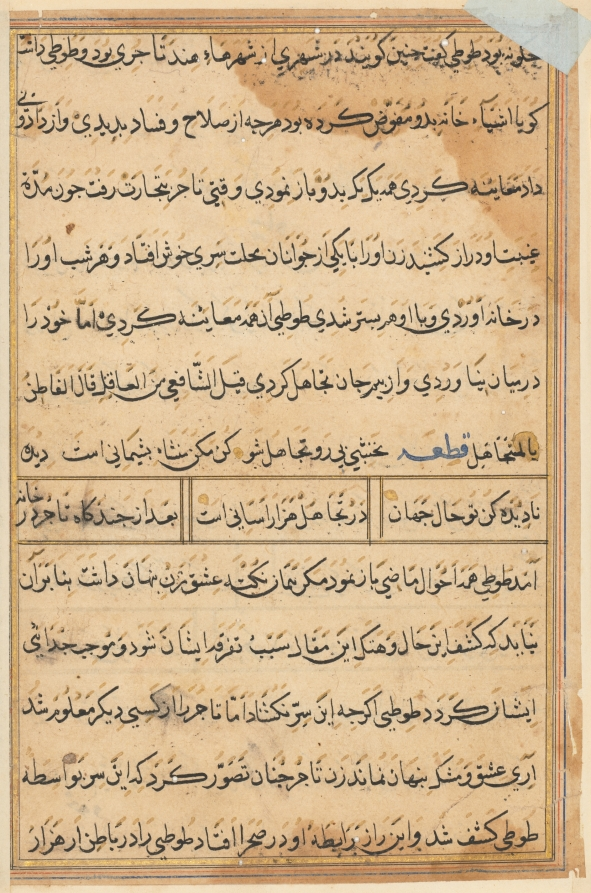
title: Page from Tales of a Parrot (Tuti-nama): text page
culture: Mughal India, court of Akbar (reigned 1556–1605)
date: c. 1560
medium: gum tempera, ink, and gold on paper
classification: Painting